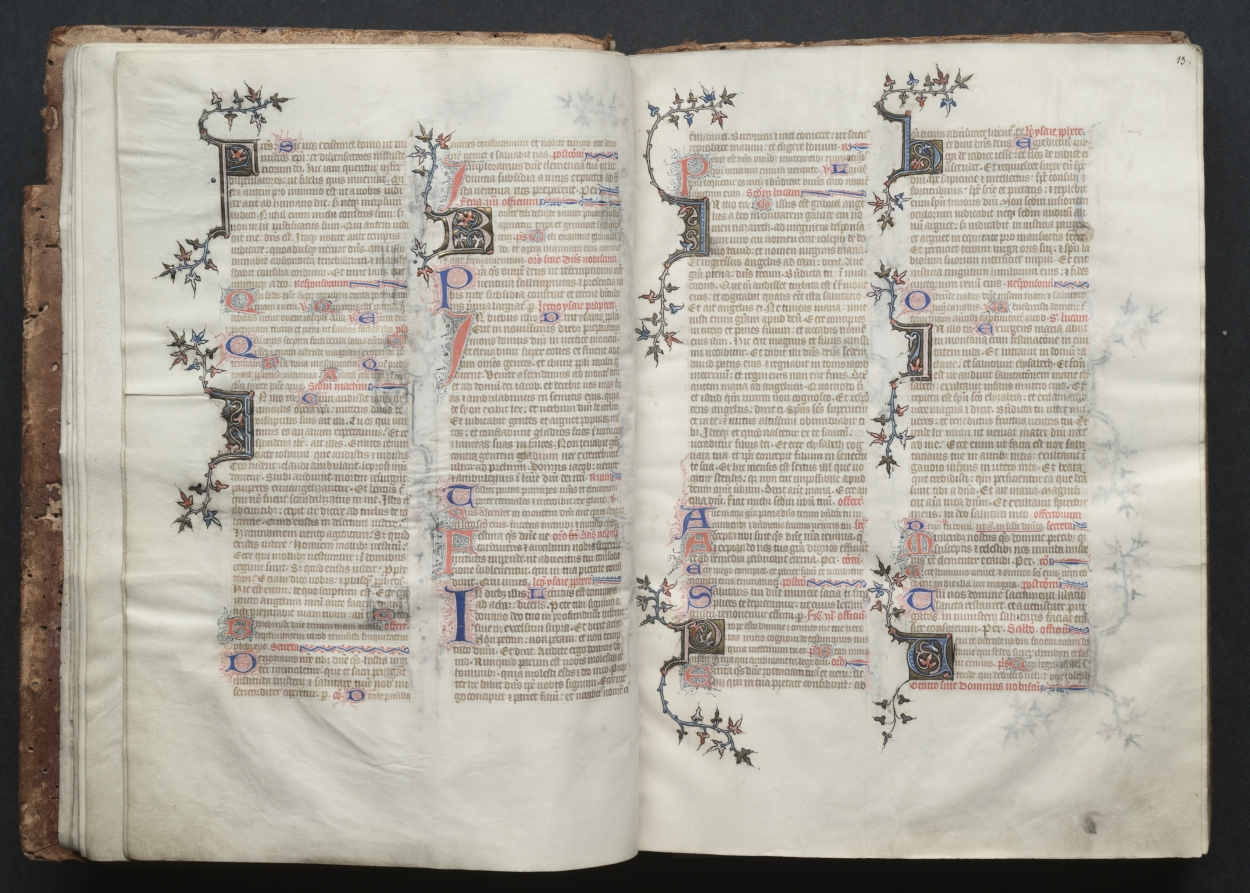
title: The Gotha Missal: Fol. 12v, Text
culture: France, Paris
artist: Master of the Boqueteaux (French)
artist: and Workshop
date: c. 1375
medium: ink, tempera, and gold on vellum; blind-tooled leather binding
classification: Bound Volume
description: The style and quality of this manuscript's decoration is typical of deluxe Parisian books made for aristocratic or royal patrons. Most of the book's decoration appears to be the work of the Master of the Boqueteaux, an artist active at the court of King Charles V (died 1380). His style was apparently shared by a number of book illuminators working in and around Paris. It is very possible that the Gotha Missal belonged to Charles V, but is not provable because the manuscript has no royal portraits and lacks a colophon. Given the book's magnificent decoration, however, it would seem that it was produced for a Valois prince, if not for the king himself. The manuscript receives its name from the German dukes of Gotha, its later owners.